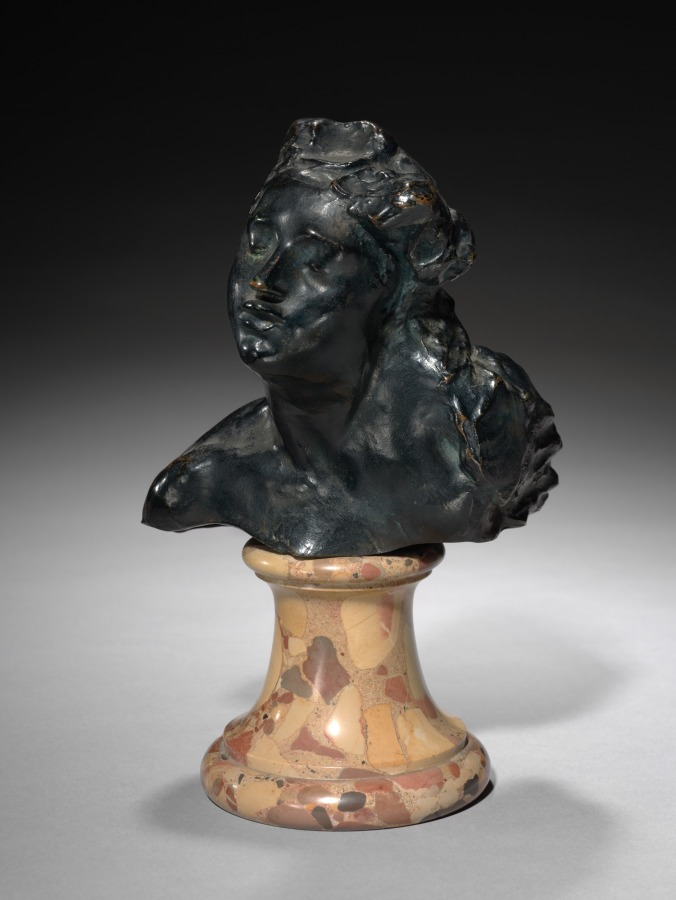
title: Head of the Little Martyr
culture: France, late 19th-early 20th century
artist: Auguste Rodin (French, 1840–1917)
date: c. 1880 – 1885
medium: bronze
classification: Sculpture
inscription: Signed sinister side: "A. Rodin"; inside front in relief: "A. Rodin"